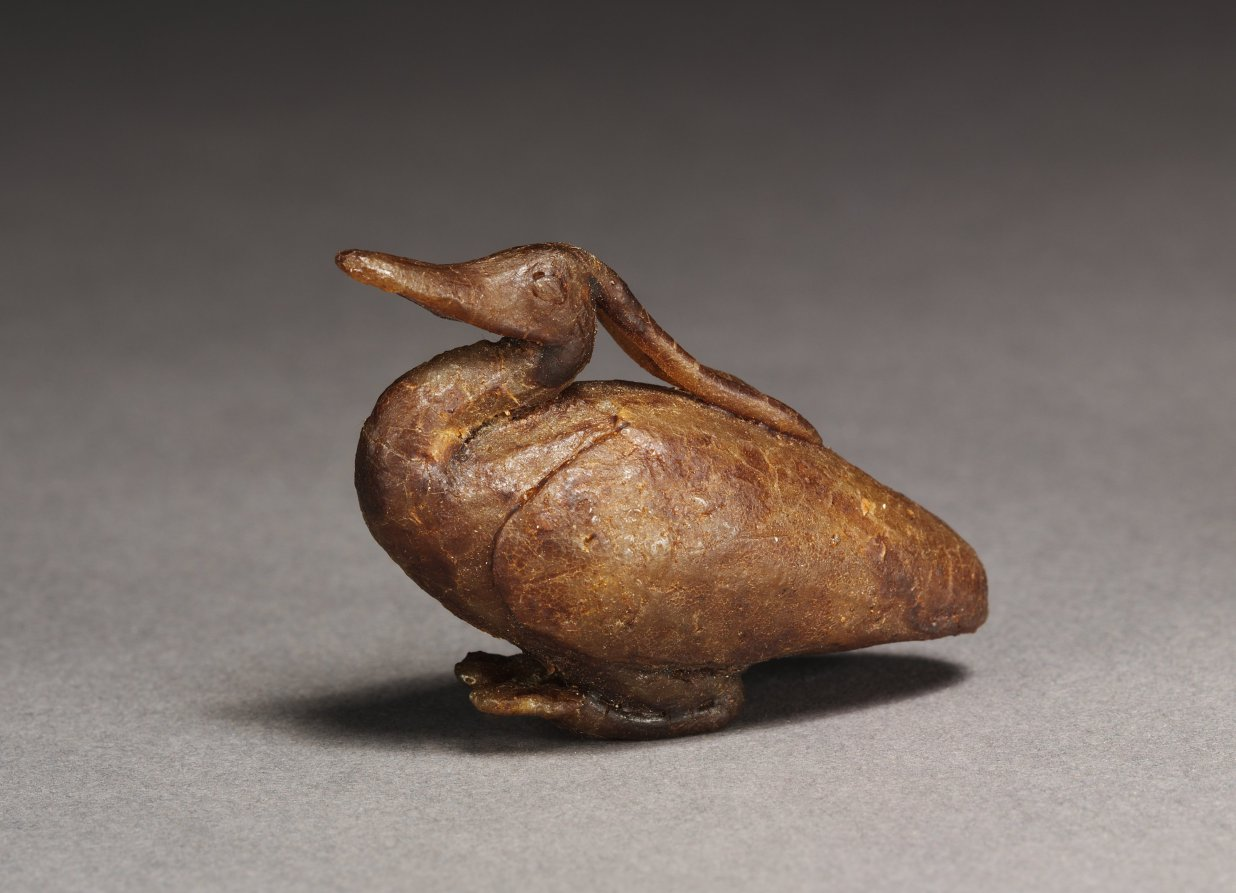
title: Benu-bird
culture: Egypt, Third Intermediate (1069–715 BCE), Dynasties 21–22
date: 1000–500 BCE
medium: honey-colored wax with dark amber varnish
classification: Funerary Equipment